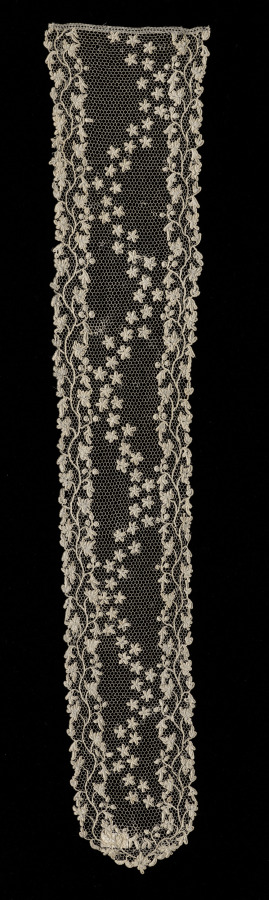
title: Lace Lappet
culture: France, Argentan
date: 1700s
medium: Linen: needle lace (Point de Argentan)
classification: Lace